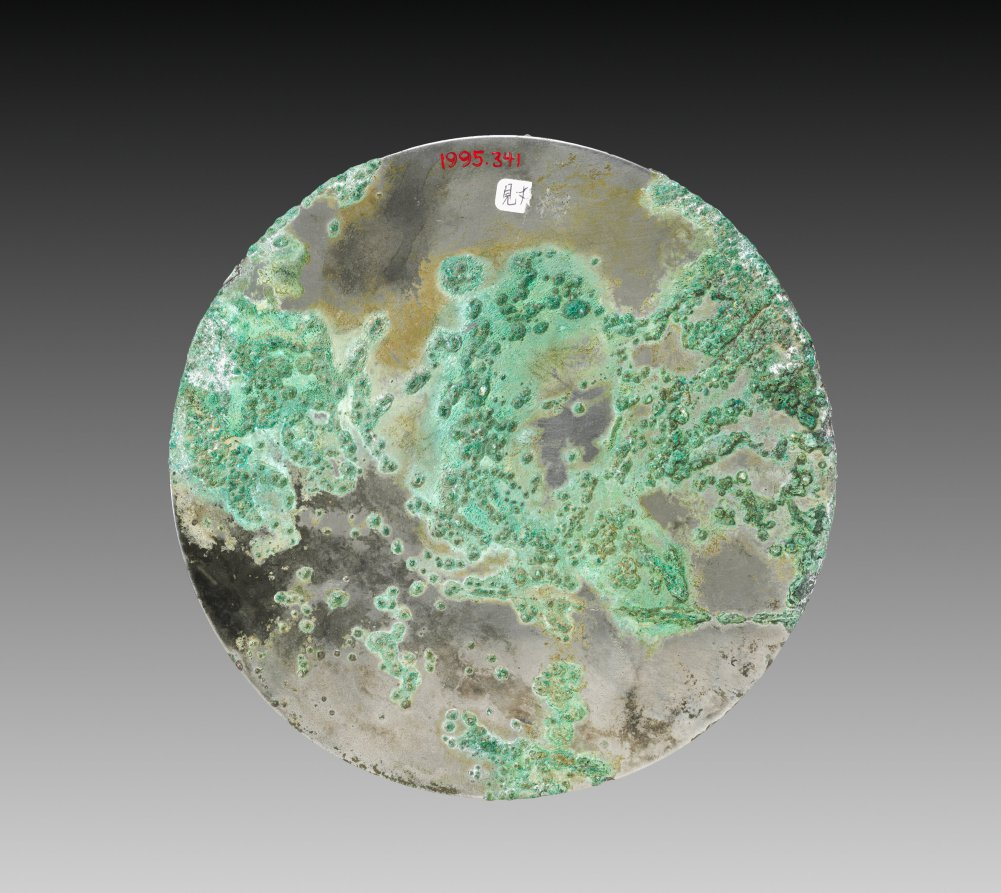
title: Mirror with Six Circular Flowers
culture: China, Tang dynasty (618-907)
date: 600s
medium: bronze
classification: Metalwork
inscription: 【】【】【】膽，知幽察微。珠慚朗潤， 月謝光輝。【】兵既弭，福慶斯歸。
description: Around the mirror’s central knob, there are six floral designs set within circles, separated by candelabra-like dividers. These flower designs later became known as "baoxiang hua 寶相花" or "flowers of precious appearance", which often remind people of Buddhist connections. The design also includes a ribbon of inscription, praising the mirror’s clarity and celebrating the end of a war.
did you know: This mirror was made to commemorate the end of a war.